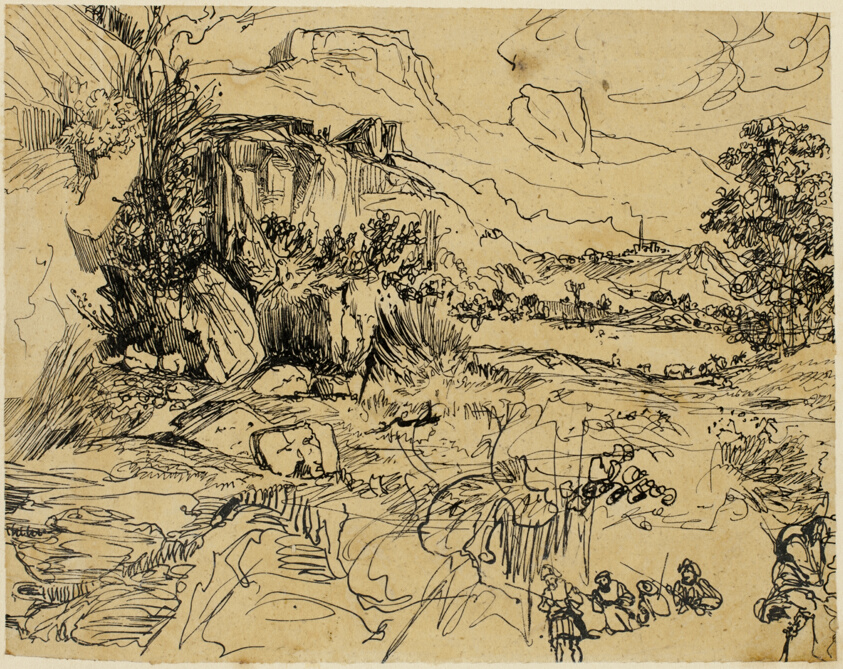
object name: Drawing and Watercolor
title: Advance Guard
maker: Rodolphe Bresdin (French, 1825-1885)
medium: Pen and black ink, on tan tracing paper, laid down on buff wove paper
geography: France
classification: pen and ink drawings; drawings (visual works); prints and drawing